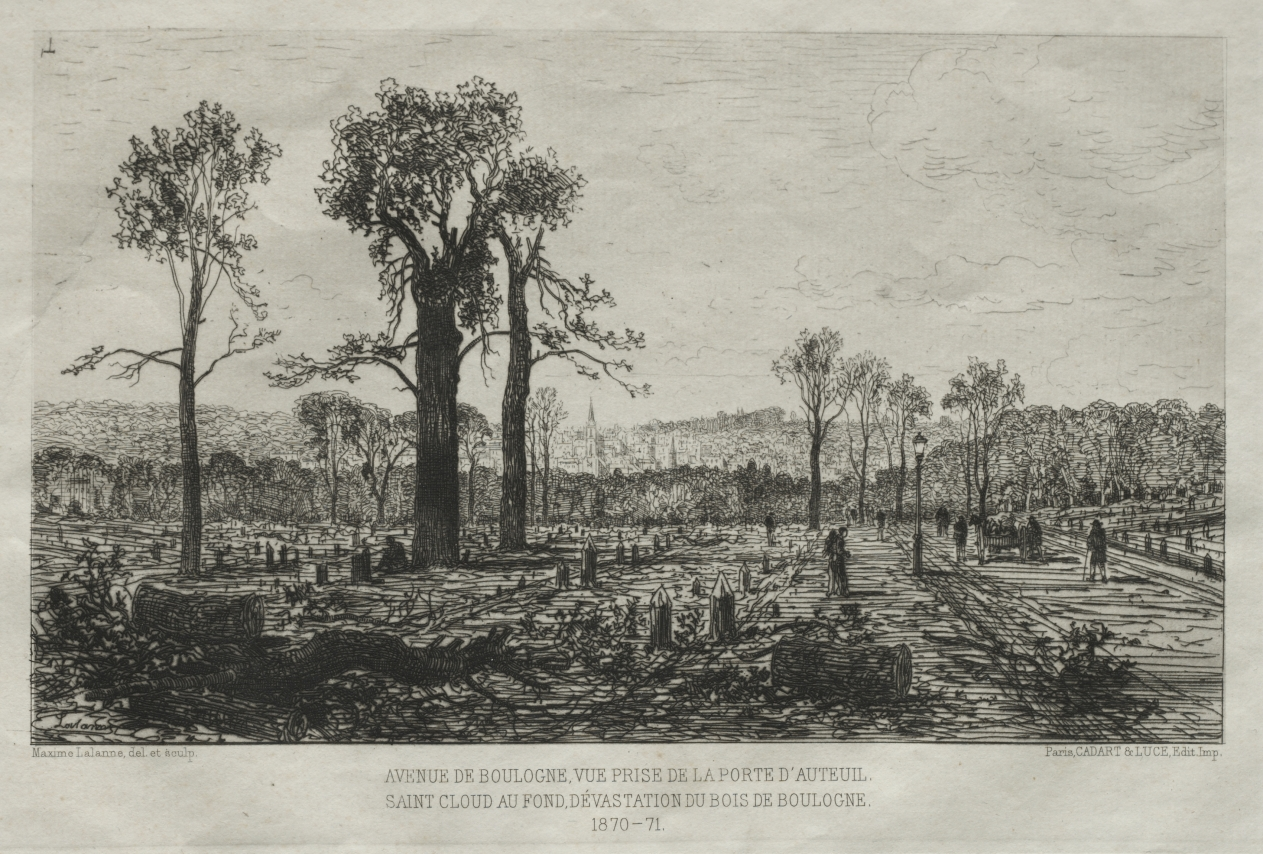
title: Souvenirs artistiques du Siége du Paris: Avenue de Boulogne, Vue Prise de la porte d'Auteuil, St. Cloud au fond, Dévastation du Bois de Boulogne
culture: France, 19th century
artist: Maxime Lalanne (French, 1827–1886)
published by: Cadant and Luce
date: 1879–81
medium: etching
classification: Print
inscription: printed in the lower margin: Maxime Lalanne, del et sculp (l.l); AVENUE DE BOULOGNE VUE PRISE DE LA PORTE D'AUTEUIL/ SAINT CLOUD AU FOND, DÉVASTATION DU BOIS DE BOULOGNE/ 1870-71 (l.c); Paris, CADART &LUCE, Edit. Imp.; Inscribed in plate: Lalanne (l.l).